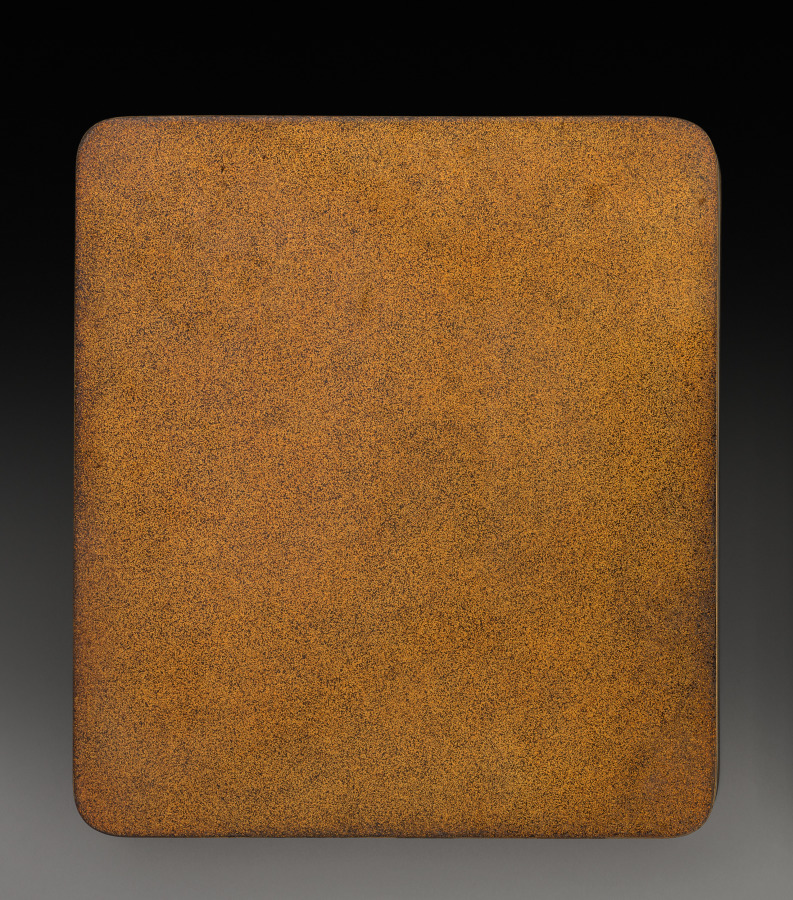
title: Base of Writing Box (Suzuribako) with Chrysanthemum and Plum Containing Inkstone, Water-dropper, Brushes, Ink-stick Holder, and Paper Knife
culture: Japan, Meiji period (1868–1912)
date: late 1800s-early 1900s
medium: Lacquer over wood with gold and silver sprinkled powder (maki-e)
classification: Lacquer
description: Both functional and elegant, this is a container for an ink stone, brushes, and ink from a set of writing tools that included a larger box for paper. Against a sleek gold lacquered ground, its artist has used restraint in sprinkled powder decoration (maki-e) to produce the design of cockscomb and harvested rice on the interior of the lid.